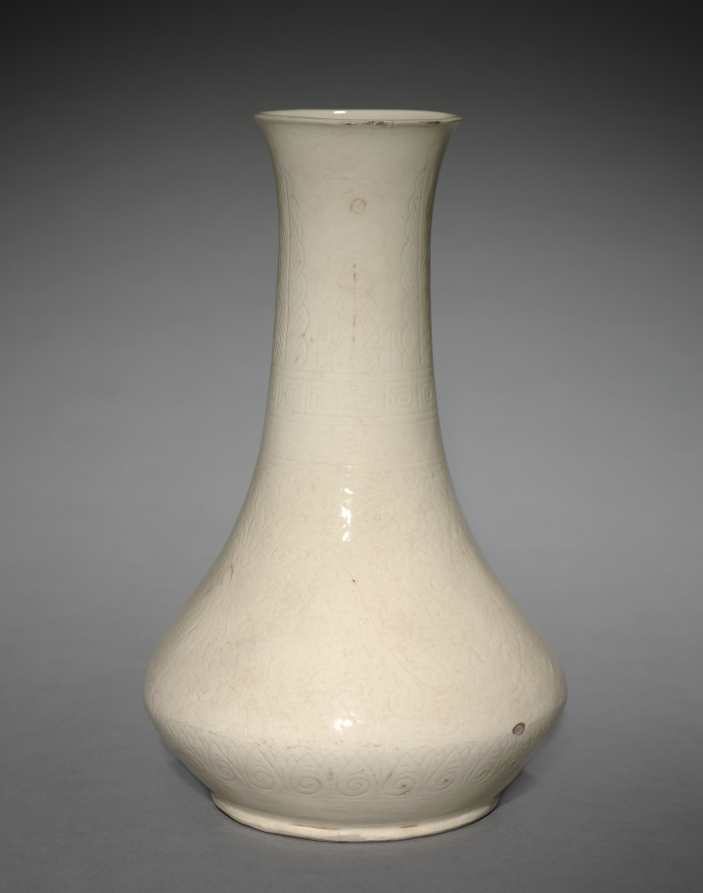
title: Vase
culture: China, Ming dynasty (1368–1644)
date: 1368–1644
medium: porcelain, Ding ware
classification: Ceramic